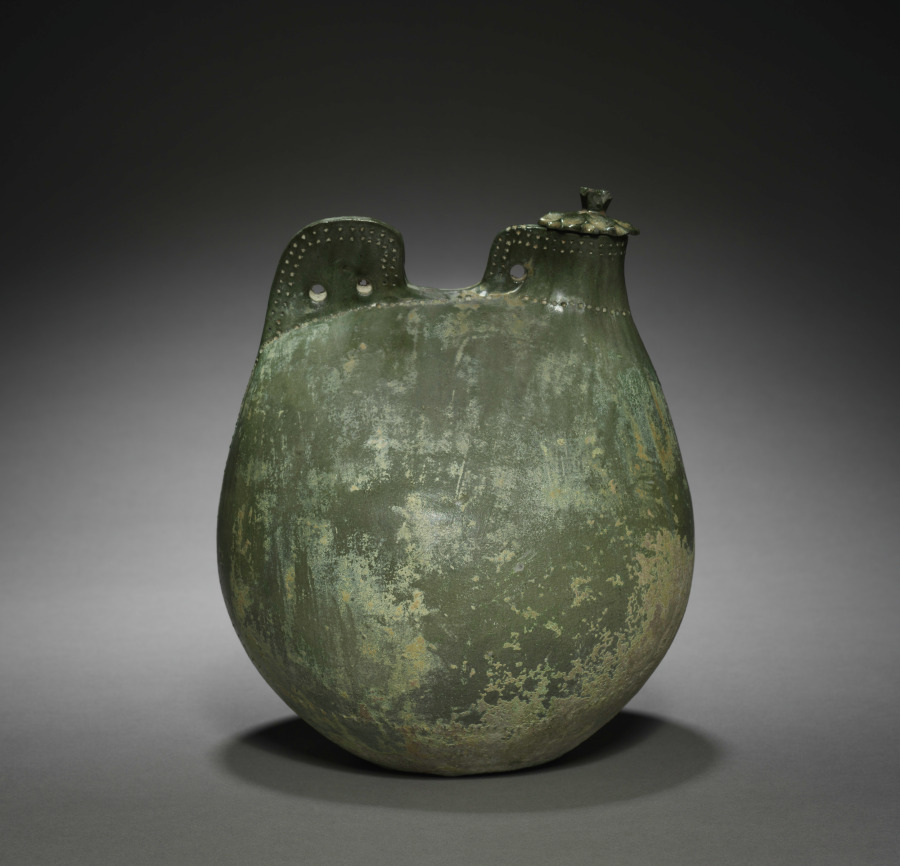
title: Leather Bag-Shaped Flask with Cover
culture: Northeast China, Liao dynasty (916-1125)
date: 916–1125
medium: earthenware with green glaze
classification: Ceramic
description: Flasks like these derive their shapes from leather bags; even the edges are finely rouletted to resemble the seams of sewn leather. These were used by the nomadic Khitan people who established the Liao kingdom in Inner Mongolia, Manchuria, and North China. Such wares represented the Liao adoption of the Tang Chinese ceramic tradition, and yet they expressed ethnic identity and new innovations resulted from the cultural borrowing.